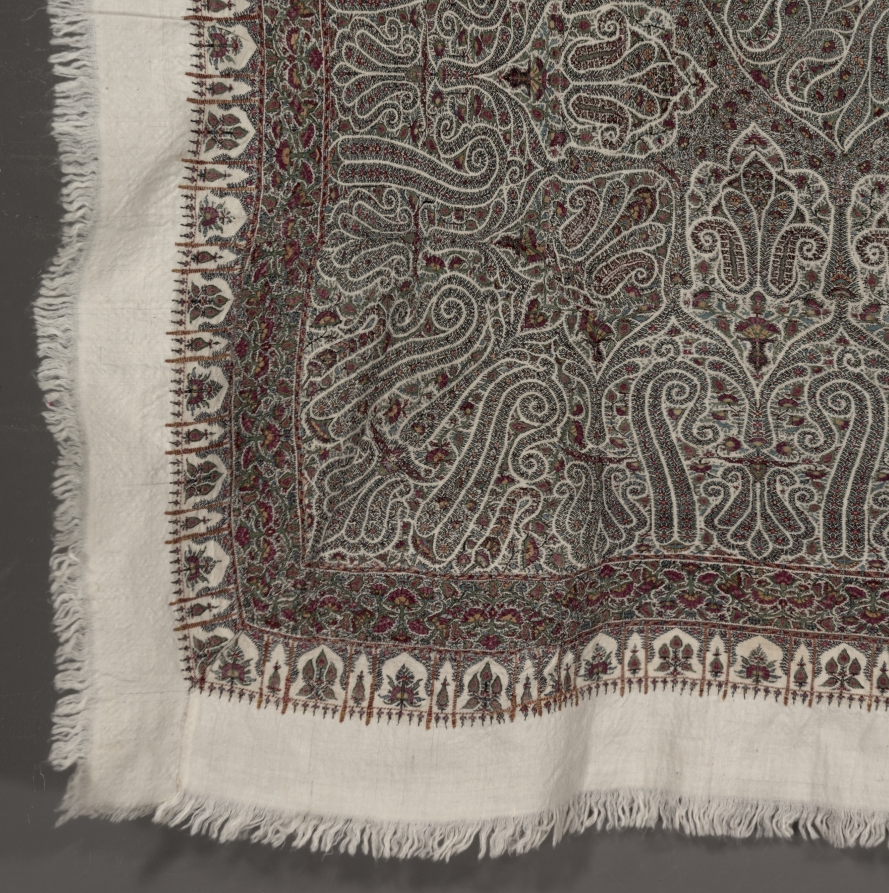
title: Square Shawl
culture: India, Kashmir, late 19th century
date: 1880s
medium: twill tapestry and embroidery; large pieced areas: wool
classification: Textile